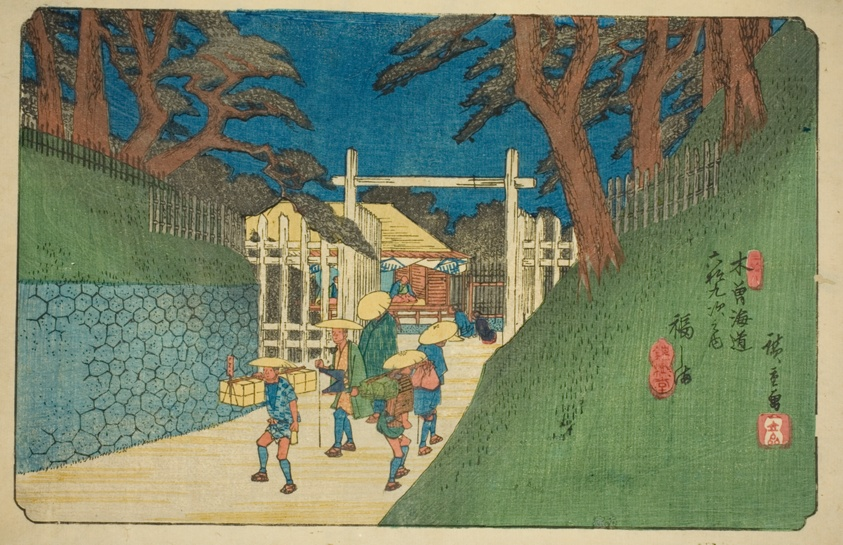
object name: Print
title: No. 38: Fukushima, from the series "Sixty-nine Stations of the Kisokaido (Kisokaido rokujukyu tsugi no uchi)"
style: Japanese (culture or style)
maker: Utagawa Hiroshige 歌川 広重; Japanese, 1797-1858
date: c. 1835/38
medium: Color woodblock print; oban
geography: Japan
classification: woodblock print; print; asian art